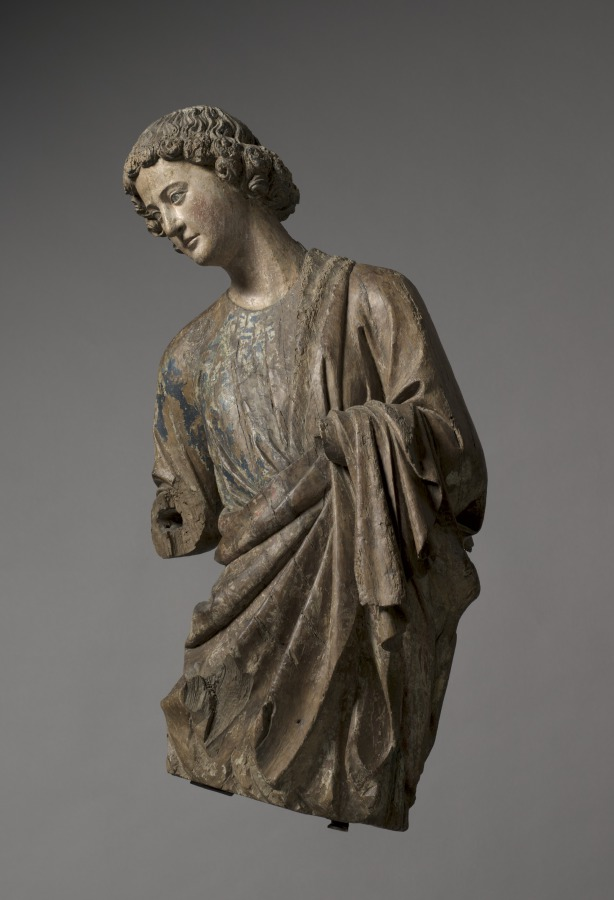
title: Angel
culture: France, vicinity of Reims, 13th century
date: c. 1250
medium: walnut with traces of gilding and polychromy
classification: Sculpture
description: Surviving in fragmentary condition, this pair of angels lacks lower arms, hands, wings, and attributes. Their original paint and gilding, now almost entirely lost, once rendered their garments a rich brocade and their hair a luxuriant gold. Nonetheless, in their graceful poses and sublime faces—which may portray tragic interest, anguish, or deep concern—their original delicacy and power are still evident. They embody the monumental style of 13th-century High Gothic cathedral sculpture in France. Their style specifically suggests they were carved in or around Reims, possibly by sculptors associated with the cathedral there. Their original placement is unknown, but they may have flanked an altar on columns.